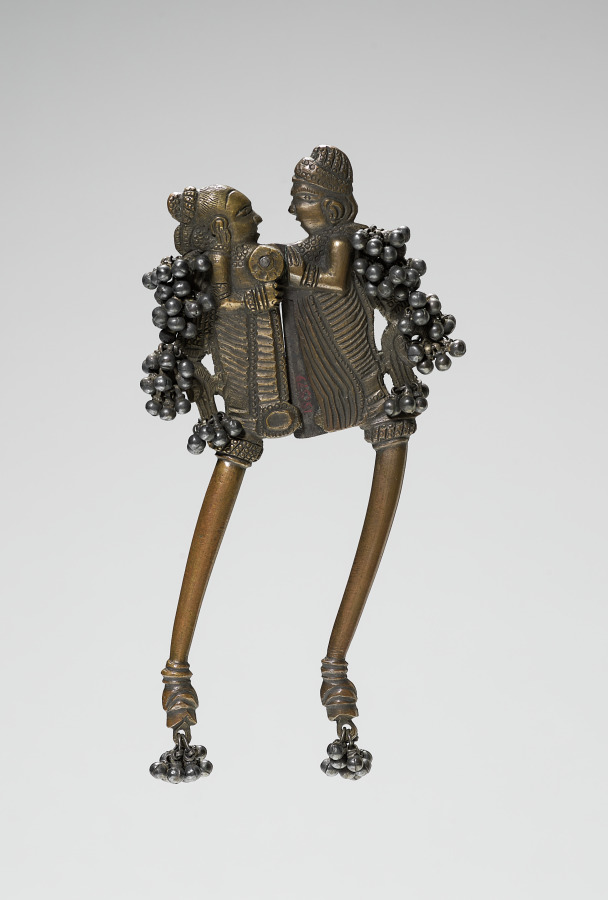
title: Betel Nut Cutter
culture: Siam, 19th century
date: 1800s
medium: porcelain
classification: Metalwork